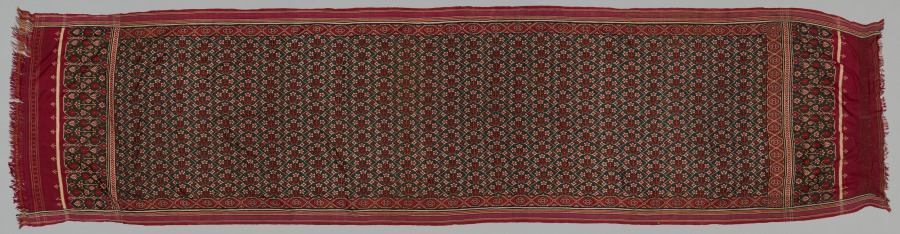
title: Silk Patolu Sari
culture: India, Gujarat, 19th century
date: 1800s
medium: tabby weave, double ikat; silk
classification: Textile